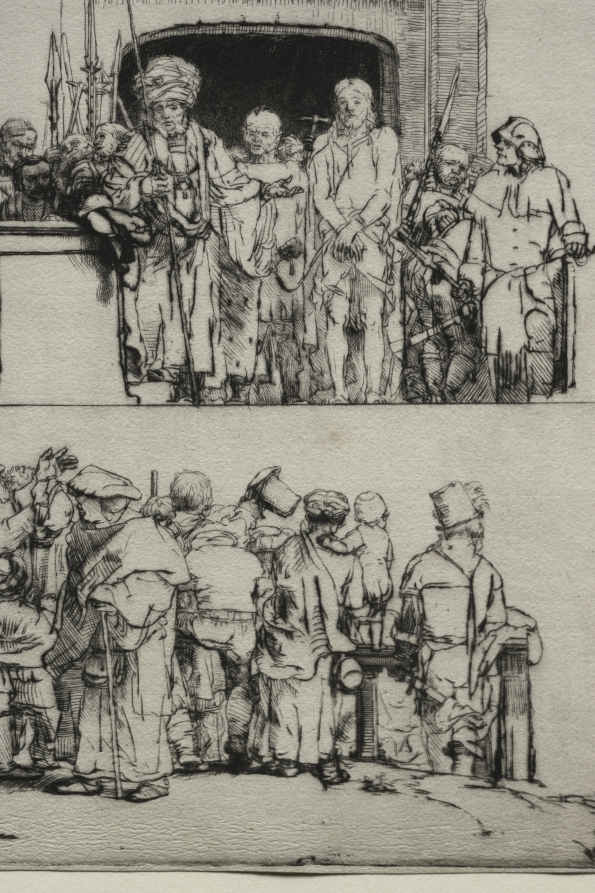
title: Ecce Homo. Christ Presented to the People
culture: Netherlands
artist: Rembrandt van Rijn (Dutch, 1606–1669)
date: 1655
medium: drypoint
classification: Print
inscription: Recto, upper left, in graphite: 79; lower left: FPS. Verso, in purple ink: Prince of Liechtenstein or Colnaghi for Liechtenstein stamp; in black ink, Zinser stamp, castle tower (rook chess piece); along side, in graphite: No. 36; along top: (illegible) name; upper left, in graphite: No 79 P(?) G (?) La Second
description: Rembrandt was an experimental and innovative printmaker and the first to execute works in pure drypoint on this monumental scale. Drypoint produces blurred lines and rich, velvety shadows, but these effects are lost as the plate wears. A limited number of rich impressions exist like this fine example of the fifth state, which demonstrates how Rembrandt redefined the expressive potential of printmaking. Rembrandt’s habit of drawing from life made him a keen observer of behavior and body language, endowing his biblical scenes with a human dimension and veracity not seen previously. The throng in Christ Presented to the People represents a cross section of the population and reflects the pictorial tradition that common humanity condemned Christ. Large areas of the imposing building, symbolizing the crushing weight and authority of the state, remain unworked so that blank white paper seems radiant in contrast to rich black shadows.